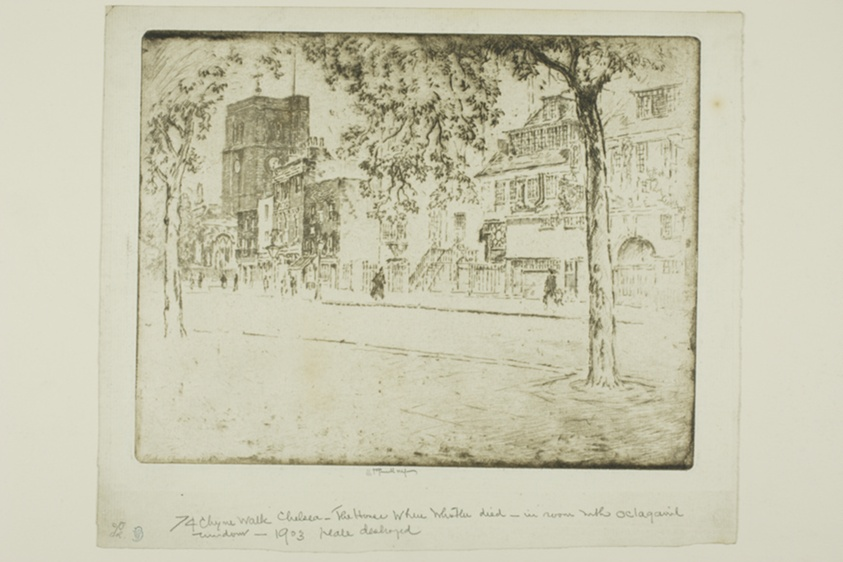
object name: Print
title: House Where Whistler Died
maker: Joseph Pennell (American, 1857-1926)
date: 1904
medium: Etching on ivory laid paper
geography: United States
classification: etching; print; prints and drawing